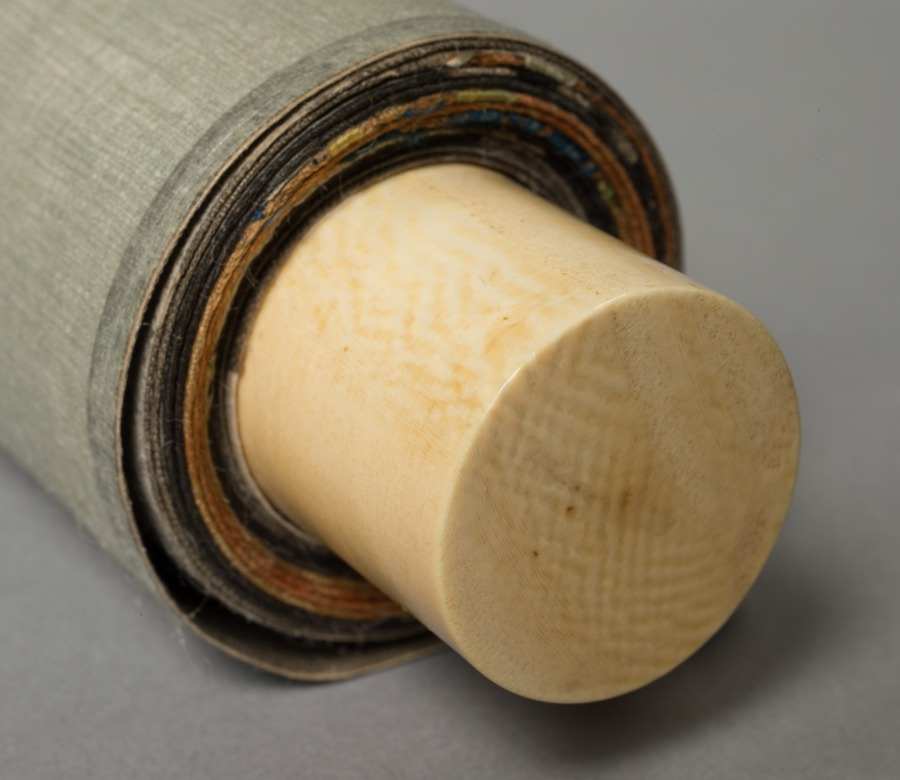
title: Pheasant and Grasses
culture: Japan, Edo period (1615–1868)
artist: attributed to Ogata Kōrin (Japanese, 1658–1716)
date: late 1600s–early 1700s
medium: hanging scroll; ink and color on paper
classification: Painting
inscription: two seals of artist, lower right.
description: Korin was a founder of the Rimpa (decorative) school of painting and was a keen observer of nature. The pheasant is often associated with autumn.